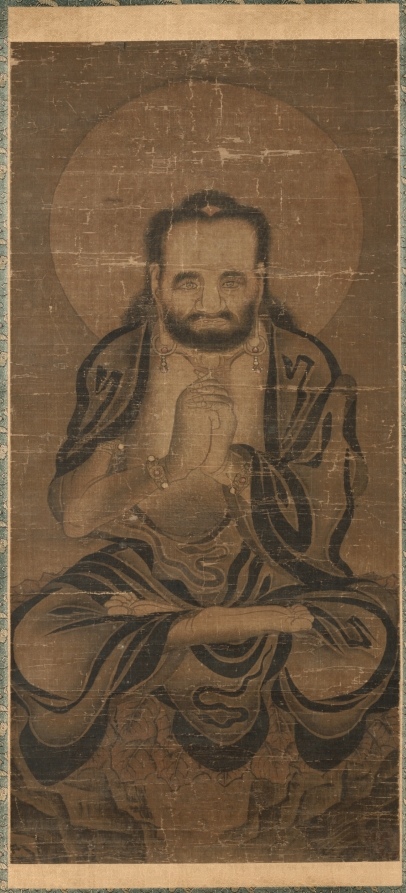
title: Sakyamuni Buddha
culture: China, Yuan dynasty (1271-1368)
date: 1300s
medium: Hanging scroll; ink and color on silk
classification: Painting